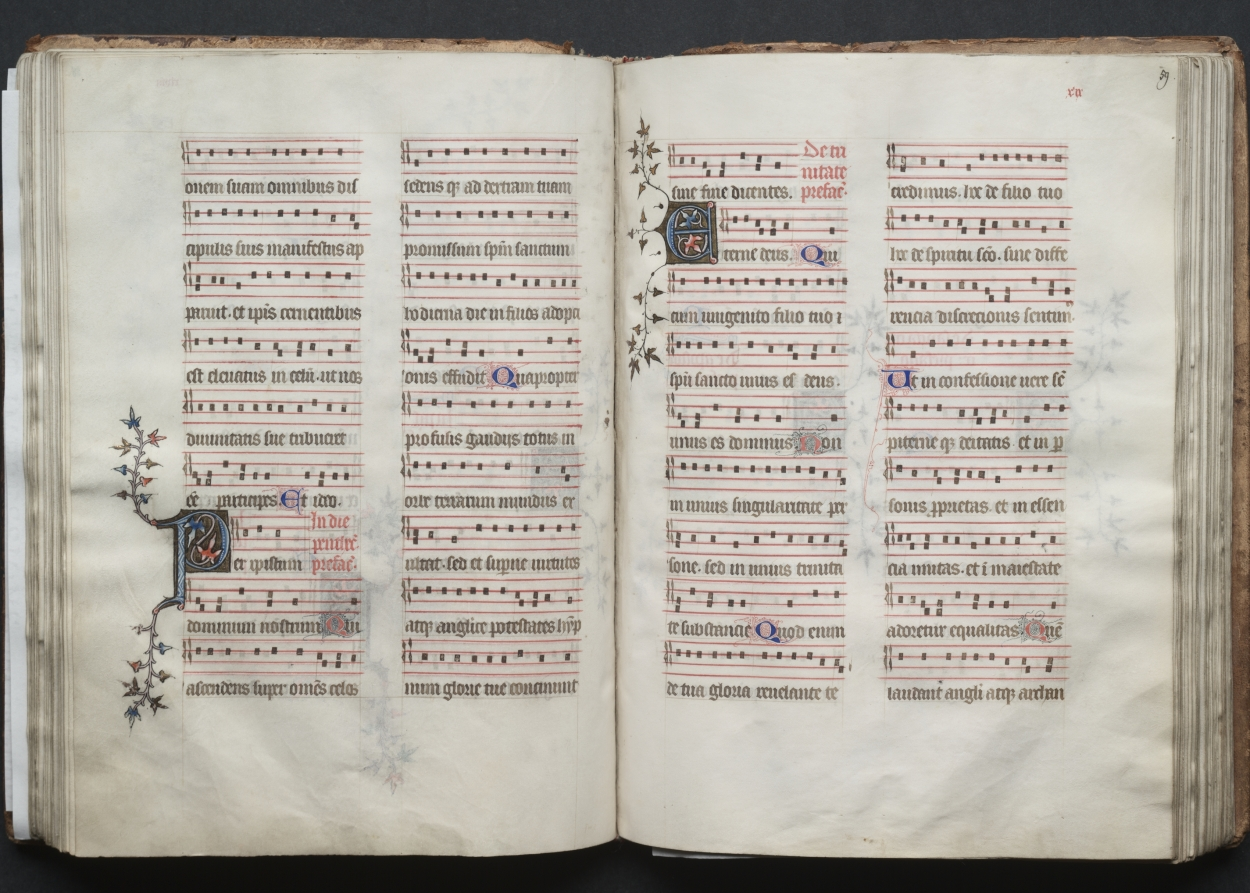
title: The Gotha Missal: Fol. 59r, Text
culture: France, Paris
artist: Master of the Boqueteaux (French)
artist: and Workshop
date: c. 1375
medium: ink, tempera, and gold on vellum; blind-tooled leather binding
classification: Bound Volume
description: The style and quality of this manuscript's decoration is typical of deluxe Parisian books made for aristocratic or royal patrons. Most of the book's decoration appears to be the work of the Master of the Boqueteaux, an artist active at the court of King Charles V (died 1380). His style was apparently shared by a number of book illuminators working in and around Paris. It is very possible that the Gotha Missal belonged to Charles V, but is not provable because the manuscript has no royal portraits and lacks a colophon. Given the book's magnificent decoration, however, it would seem that it was produced for a Valois prince, if not for the king himself. The manuscript receives its name from the German dukes of Gotha, its later owners.